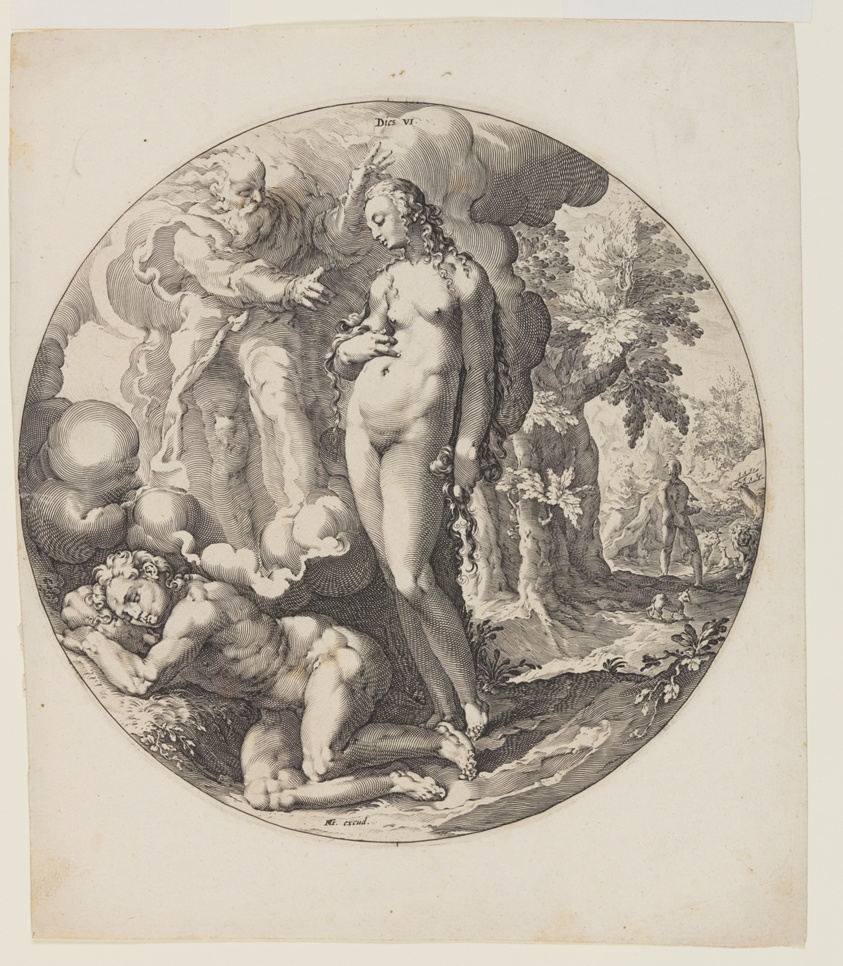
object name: Print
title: The Sixth Day, plate 7, from Creation of the World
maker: Jan Harmensz Muller (Dutch, 1571–1628); after Hendrick Goltzius (Dutch, 1558–1617)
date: 1590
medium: Engraving on ivory laid paper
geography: Netherlands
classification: print; paper; prints and drawing; engraving